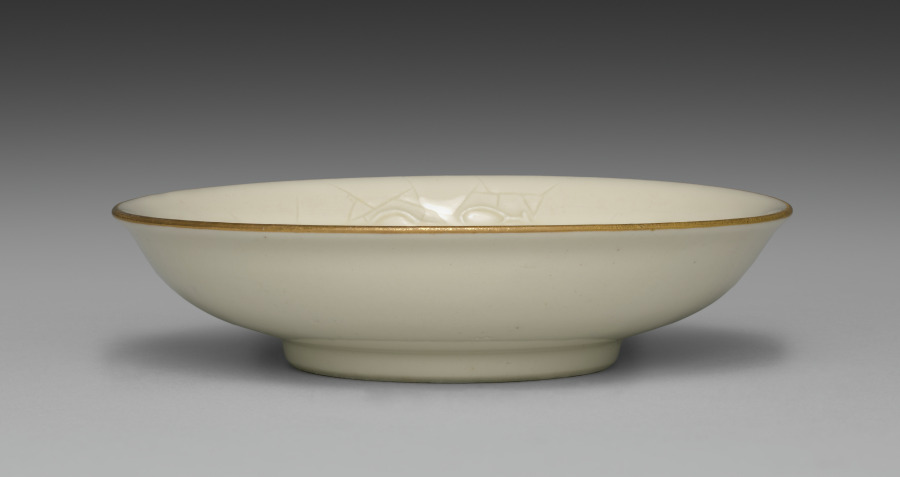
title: Small Dish from Dining Set with Plum Blossoms and Cracked-Ice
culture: Japan, Meiji period (1868–1912)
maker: Seifū Yohei II (Japanese, 1844–1878)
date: c. 1875–78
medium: Porcelain with molded designs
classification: Ceramic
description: Each item in this set has a delicate low-relief design of flowering plum branches over scattered, intersecting lines meant to resemble the cracked-ice surface of a frozen body of water and is signed on the base in gold pigment. While Yohei II produced many fine works in underglaze blue, like those produced by Kiyomizu Shichibei, he also made works in quite different styles later in his career, from the early 1870 s. In 1873, he was appointed purveyor to the Industrial Center of Kyoto Prefecture, a designation associated with Kyoto’s efforts to reach an international market through the port of Kobe; and from 1875 until his death, he was involved in national-level projects to present Japanese ceramics across the world. It was during this period that Yohei III was apprenticed to Yohei II, and it has been suggested that this set may in fact be an early example of Yohei III’s work, which he signed with his teacher’s name. Decorated with flowers resembling Japanese textile motifs, the set calls to mind the design of Yohei II’s pair of vases with plum blossoms in the Victoria and Albert Museum. Here, the elaborate trees created for a formal public exhibition setting have been translated into the approachable blossoms of the genteel domestic environment. While the designs are consistent across the pieces, each raised flower petal and pistil and each incised line in the ice was done by hand, so the cups, bowls, and dishes are similar yet unique. The bottoms of two boxes once identified the set’s owner, but the information has been deliberately obscured with black ink. However, inscriptions still visible appear to indicate two occasions, once at the end of July 1886 , and once again in June 1916 , when parts of the set were requested from Hokura in Niigata Prefecture. The location corresponds to a neighborhood in the present-day city of Jōetsu. The surname Tsuji 辻 also appears on a paper tag affixed to one of the box cloths. Future research may possibly reveal more about their provenance. A vase by Yohei III in a private collection combines the formal grandeur of the Yohei II vases in the Victoria and Albert Museum with the gentler design of this dining set, placing flowering plum trees against soft, scalloped-edge clouds resembling those in golden screens.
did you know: The dining wares have a creamy white coloration that the four boxes containing them identify as Korean in style.